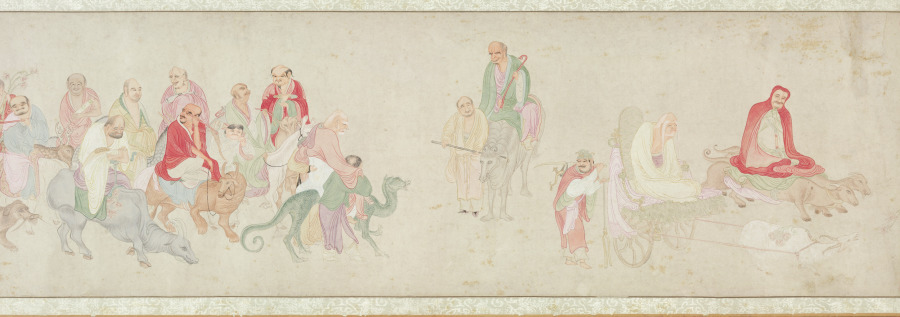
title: The Five Hundred Arhats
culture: China, Ming dynasty (1368–1644)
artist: Wu Bin (Chinese, active c. 1591–1626)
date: 1591–1626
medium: Handscroll; ink and color on paper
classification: Painting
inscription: 枝隱頭陀吳彬齋心拜寫 [印]吳彬之印; 文中父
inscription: 7 seals of Qianlong emperor (r. 1736–95): Gu xi tian zi 古希天子; Shou 壽; Qianlong jian shang 乾隆鑑賞; San xi tang jing jian xi 三希堂精鑑璽; Yi zi sun 宜子孫; Tai shang huang di zhi bao 太上皇帝之寳; Qian qing gong bao 乾清宮寶.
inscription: 6 seals of Cheng Qi 程琦 (1911–1988): Ke an geng zi wu shi yi hou suo de ming ji 可菴庚子五十以後所得名跡; 5 other Cheng Qi seals.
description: More than 66 feet long, this handscroll depicts 447 luohans, 72 attendants, and the bodhisattva of compassion at its very end. Luohans (arhats in Sanskrit), disciples of the Buddha and protectors of the Buddha’s law, possess supernatural powers and take on myriad external appearances. The amusing assortment of characters are engaged in an array of religious, secular, and miraculous activities. The painter used stylistic features borrowed from earlier artists, carefully controlled lines, and refined coloring. Wu Bin was a lay Buddhist and depicting this sort of image was part of a religious practice seeking understanding of the Buddha’s teaching.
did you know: Far advanced on the path to enlightenment, arhats have the capacity to tame tigers, free dragons, and to float on water or in the air.